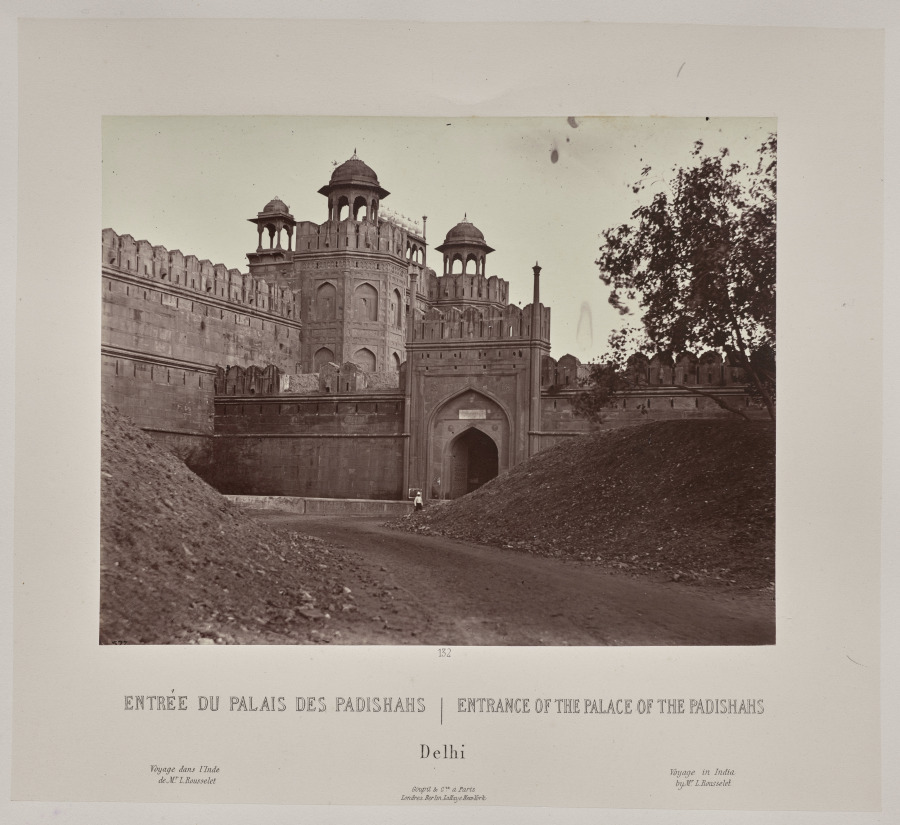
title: Entrance of the Palace of the Padishahs, Delhi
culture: France, 19th century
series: India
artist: Louis-Théophile Marie Rousselet (French, 1845–1929)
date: 1865–68, published 1869–70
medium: Albumen print from glass plate negative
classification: Photograph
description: Concerned that his drawings did not do justice to the splendor of India’s monuments, Rousselet learned photography in India that year, a remarkable accomplishment. He proved to be a talented photographer with a sophisticated sense of composition. The scenes in this volume sweep across sites of Sultanate, Rajput, and Mughal power in northern India, from the sacred Hindu city of Varanasi on the Ganges River to Alwar in Rajasthan. Also included are several scenes of industry and portraits of Indian rulers.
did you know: Louis Rousselet described himself as a “scientific traveler” when he went to India alone at age 18 in 1863 and stayed into 1868